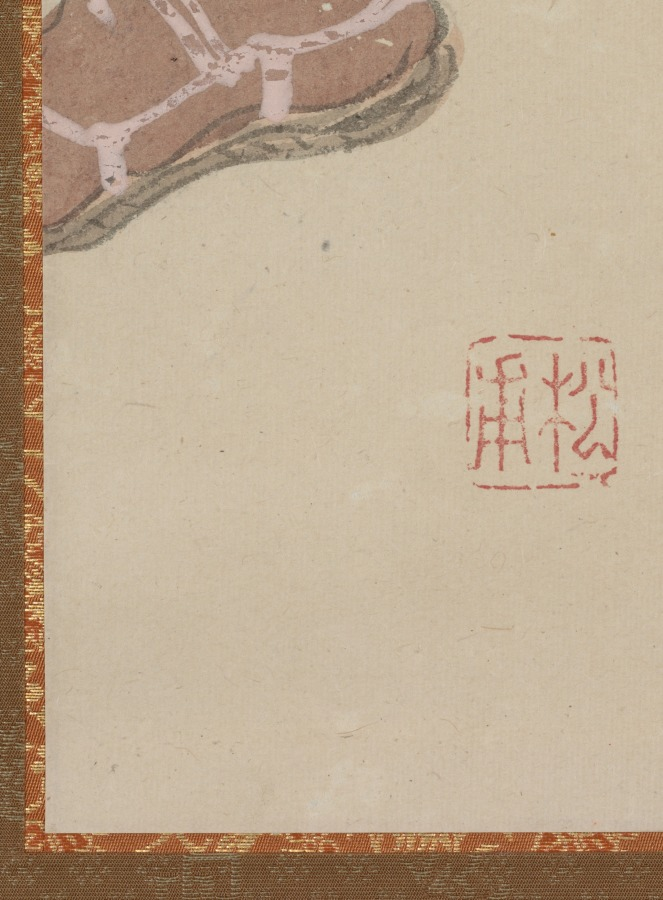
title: Genre Figures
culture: Japan, Edo period (1615–1868)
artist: Takebe Sōchō (Japanese, 1760–1814)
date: c. 1816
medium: hanging scroll; ink and color on paper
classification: Painting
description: Though rarely mentioned in official histories, Socho was an accomplished painter whose talent is readily apparent to the modern eye. For his compositions he chose traditional Japanese stories or everyday events. This painting belongs to a triptych (set of three) that was recently converted from folding screen panels to hanging scrolls.